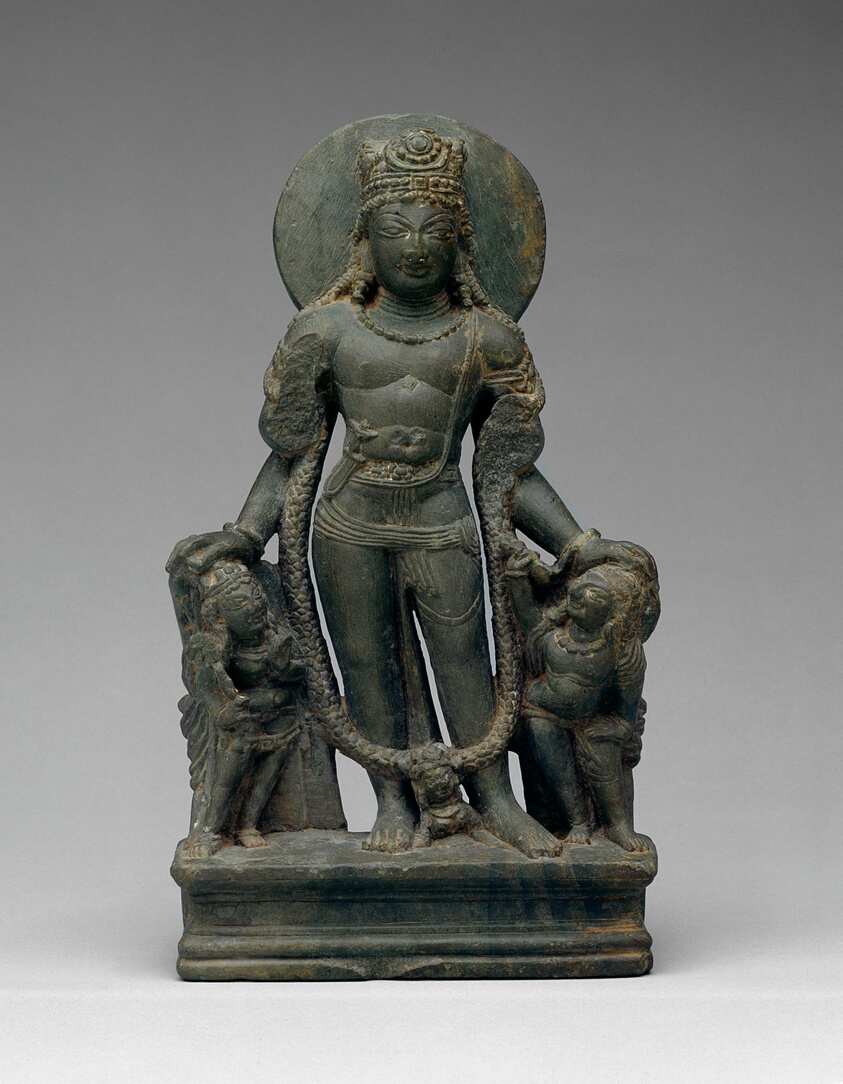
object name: Sculpture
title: Four-Armed Standing God Vishnu with Personified Weapons (Ayudhapurusha)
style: South Asian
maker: India; Kashmir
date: 8th/9th century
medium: Green chlorite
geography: Kashmir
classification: schist; stone; sculpture; asian art